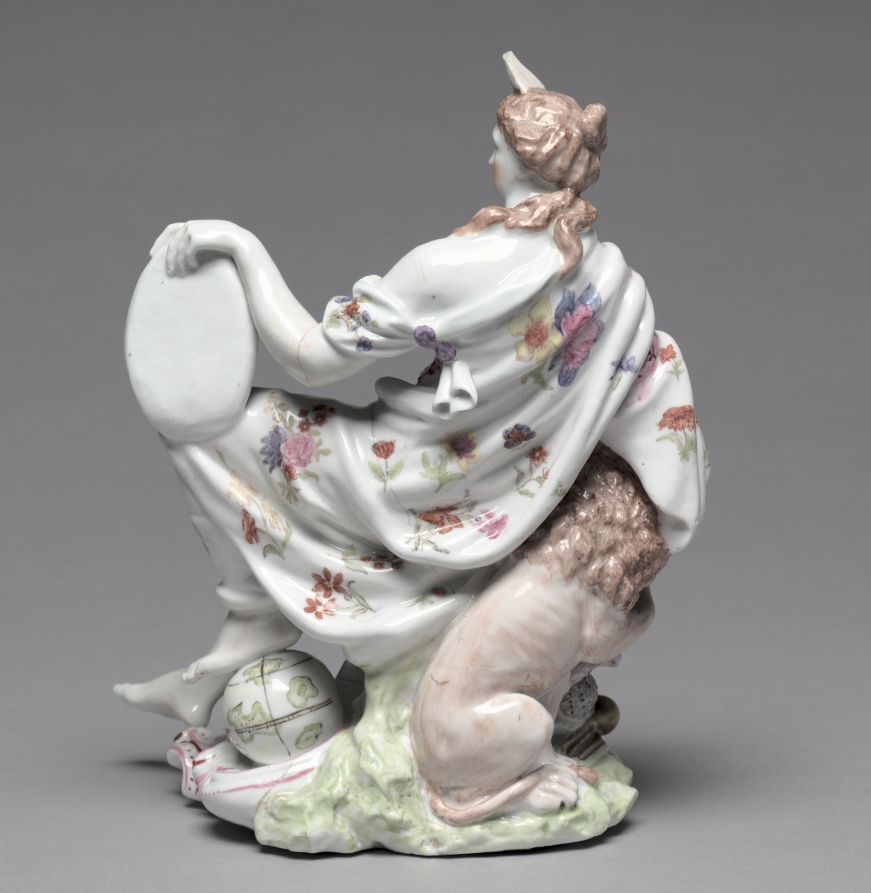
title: Figure of Britannia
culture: England, Staffordshire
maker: Longton Hall Porcelain Factory (British, Staffordshire, 1749–60)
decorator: Vauxhall Porcelain Factory (British, 1751–1764)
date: c. 1756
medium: soft-paste porcelain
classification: Ceramic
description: In this depiction of Britannia, the figure is surrounded by symbols of England’s power and military might. On one side, she and a lion, another symbol of Britain, support a shield adorned with the Union flag. Below it lay motifs associated with war such as armor, a trumpet, and a flag. On her left, Britannia presents a medallion to the viewer as she rests her feet on a globe, a symbol of the nation’s territorial aspirations. The portrait may depict the reigning king, George II (1683–1760), or Prince Frederick Louis (1707–1751), his recently deceased heir.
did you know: The creation of this triumphant personification of the nation was likely spurred on by Great Britain’s conflict with France in the Seven Years’ War (1756–63).